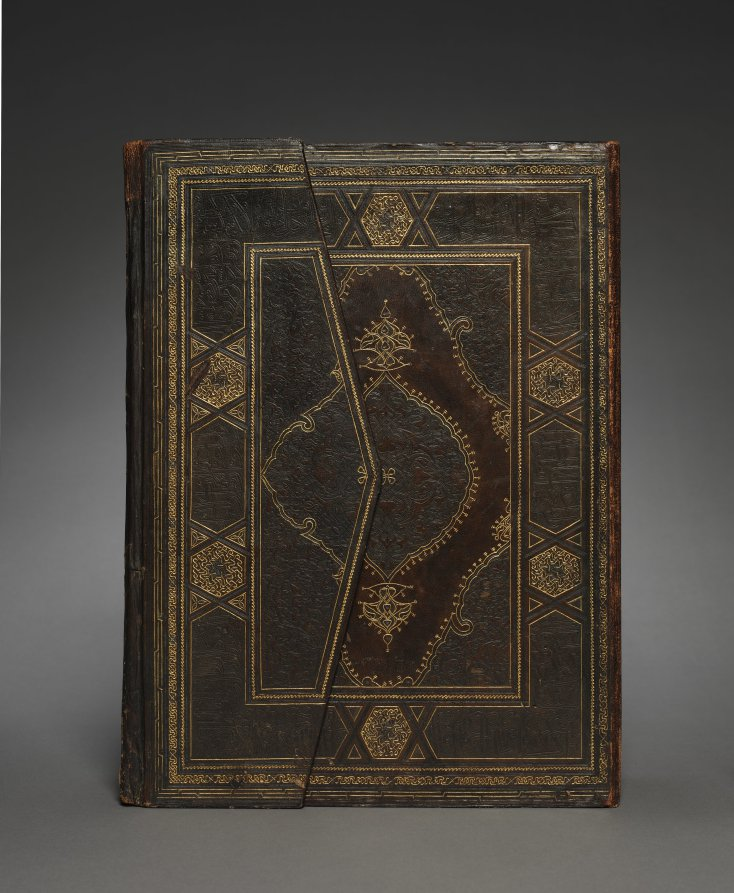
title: Bookbinding for a Qur'an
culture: Turkey, Istanbul, Ottoman period, 15th century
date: 1460–1500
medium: leather over paper pasteboards; outer cover tooled, blue paint; inner covers openwork designs over colored papers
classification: Book Binding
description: Islamic book covers generally have a triangular flap attached to the rear cover of the binding which is tucked under the front cover to protect the outside edge of the pages. The outer covers of this particularly elaborate example feature panels with Qur'anic inscriptions, interlace patterns, and a central medallion filled with floral and arabesque designs. The inner covers offer a superb example of leather openwork, a leather technique that originated in northeastern Iran in the 1400s.